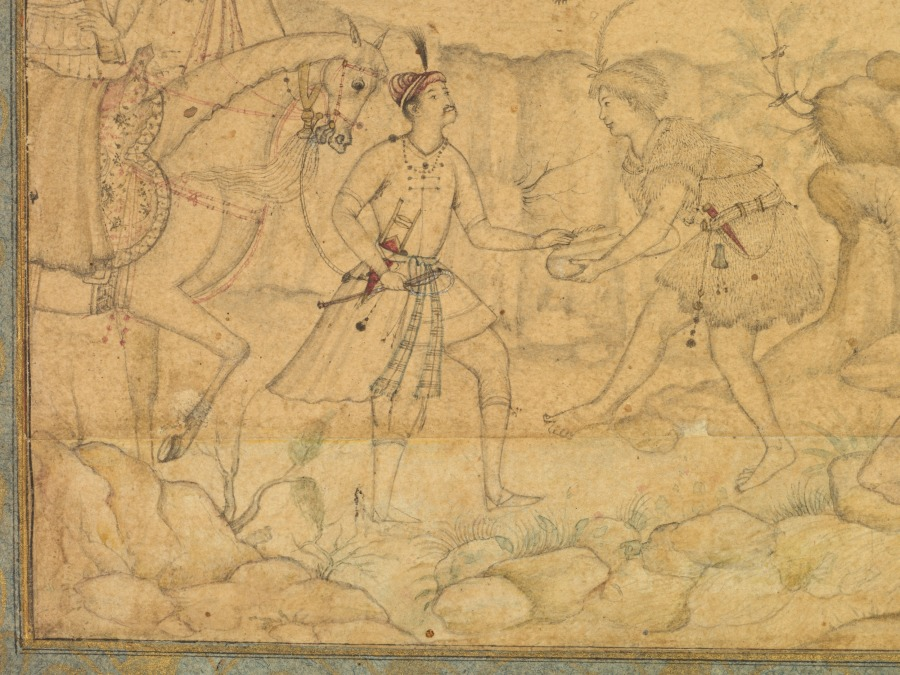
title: A Prince Visiting a Holy Man in a Rocky Landscape (recto)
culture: India, Mughal, 16th century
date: c. 1590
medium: Gum tempera, ink, and gold on paper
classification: Painting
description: A recurring theme in the art of India is the relationship between rulers and the religious practitioners who were believed to control supernatural forces that would aid in the success of rule and war. A prince has come to the abode of a Sufi mystic dervish, who sits with two acolytes in front of a rocky cave that may be his dwelling. The dervish appears to be blessing the prince and the weapons carried by his retinue to help assure success in an upcoming battle. In the foreground, a princely figure leading a horse meets surreptitiously with an eccentric figure holding a squat vessel, possibly filled with a narcotic substance such as bhang, used by many groups of mystics to aid in reaching trance states.